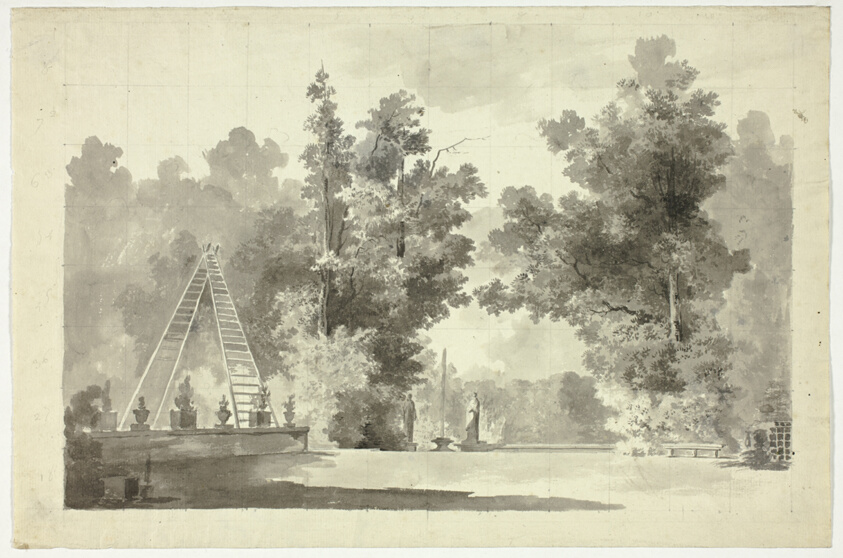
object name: Drawing and Watercolor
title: View of the Park at Versailles: Arch of Ladders with Plants; Statuary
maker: Pierre Antoine Mongin (French, 1761/62-1824/27)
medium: Brush and gray wash, over graphite, on cream laid paper, squared in graphite for transfer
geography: France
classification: ink or chalk wash; drawings (visual works); prints and drawing